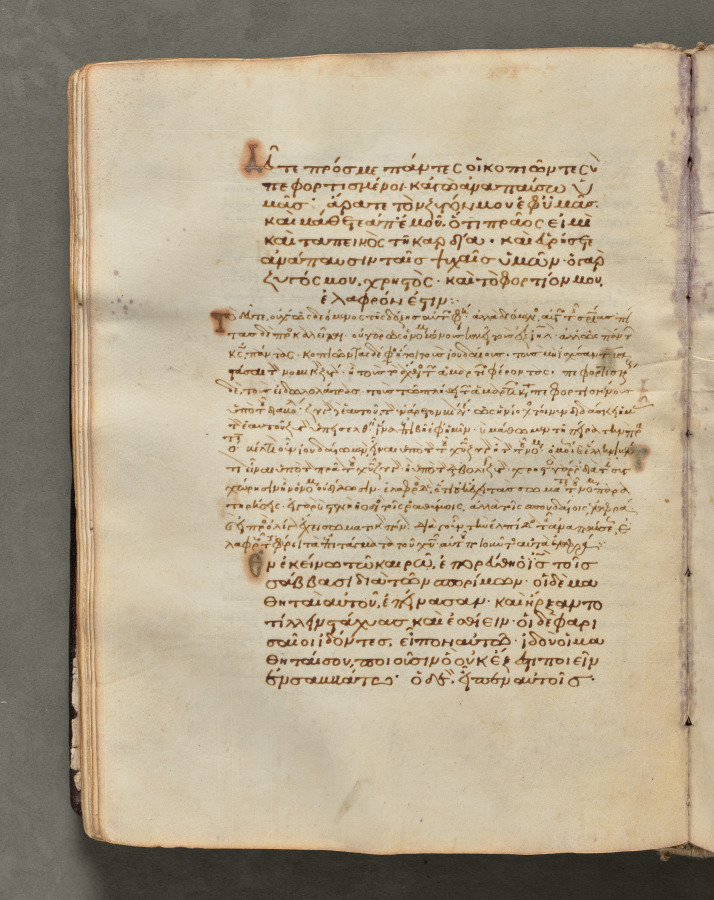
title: Text, folio 50 (verso), from a Gospel Book with Commentaries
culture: Byzantium, Constantinople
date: c. 1000–1100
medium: ink, tempera, and gold on vellum; leather binding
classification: Bound Volume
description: Each of the four gospels in this book opens on a page with brilliantly illuminated borders depicting the author of the text as well as birds-principally peacocks, symbols of the immortality of the soul-and fountains, representing the fountain of life and the salvation of the soul. This volume consists of 428 leaves with texts in Greek. Its level of sophistication suggests that it was probably written and decorated in a monastery in Constantinople.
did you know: Gospel Books were carried in procession through Byzantine churches.